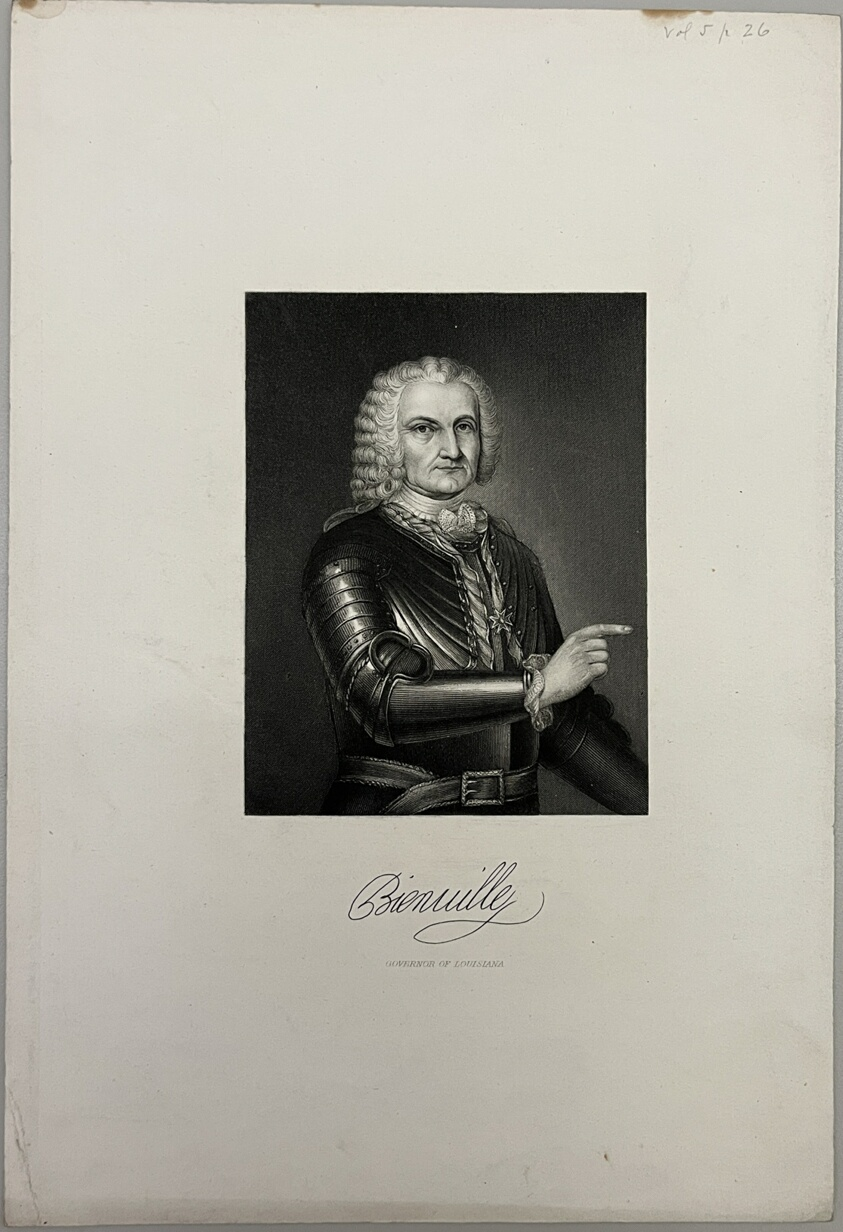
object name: Print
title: Bienville, Governor of Louisiana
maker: John Chester Buttre (American, 1821-1893); after Artist Unknown (American, 19th century)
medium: Etching on paper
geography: United States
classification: reproduction; print; prints and drawing